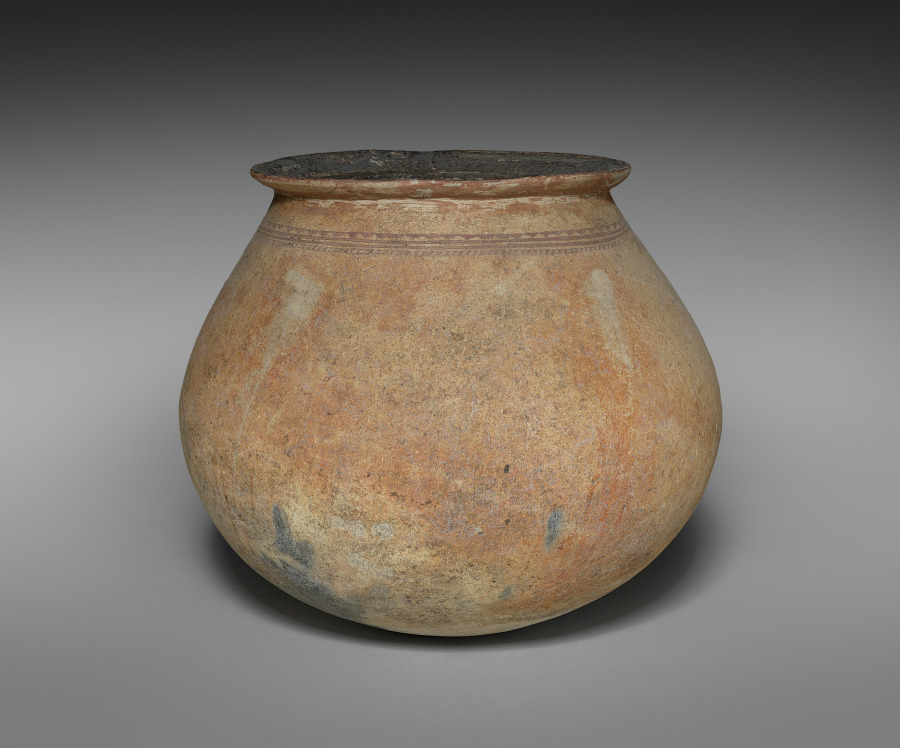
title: Jar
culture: Thailand, Ban Chiang, Neolithic Period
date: 3000s BCE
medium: reddish earthenware with painted decoration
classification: Ceramic